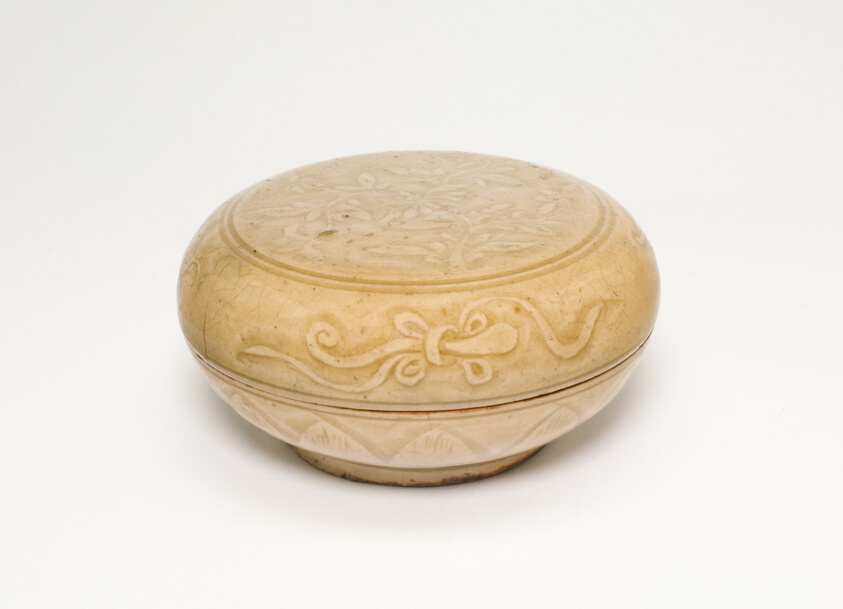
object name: Vessel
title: Covered Box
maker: China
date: Ming dynasty (1368 –1644)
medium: Stoneware with underglaze molded decoration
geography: China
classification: porcelain; asian art; ceramics